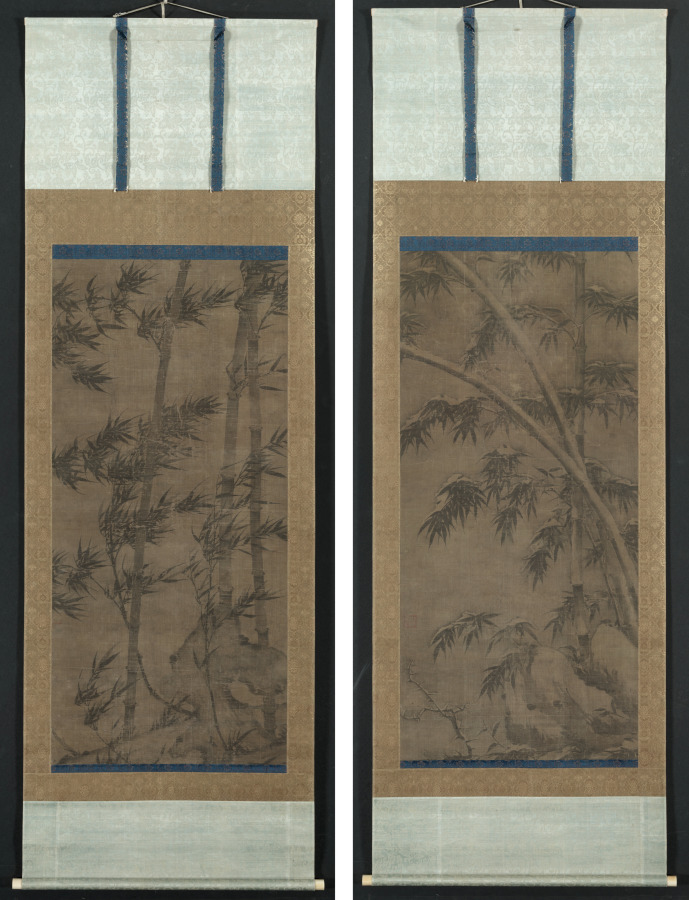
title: Bamboo in Four Seasons: Summer and Winter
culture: China, Yuan dynasty (1271-1368)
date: 1279–1368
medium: Pair of hanging scrolls; ink on silk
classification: Painting